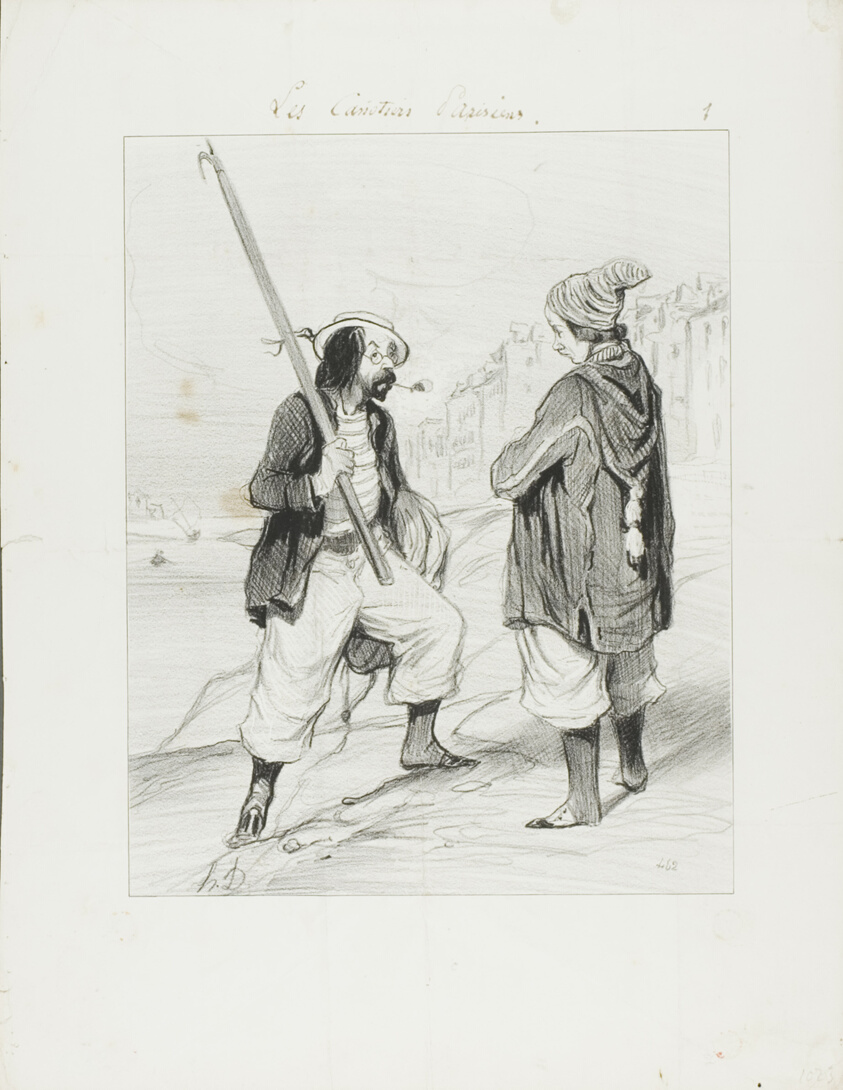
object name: Print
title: All Right Rigobert, My Old Friend…, plate one from Les Canotiers Parisiens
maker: Honoré-Victorin Daumier (French, 1808-1879)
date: 1843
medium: Lithograph in black, with additions in pen and brown ink (discolored to grayish brown), on ivory wove paper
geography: France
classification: lithograph; print; prints and drawing